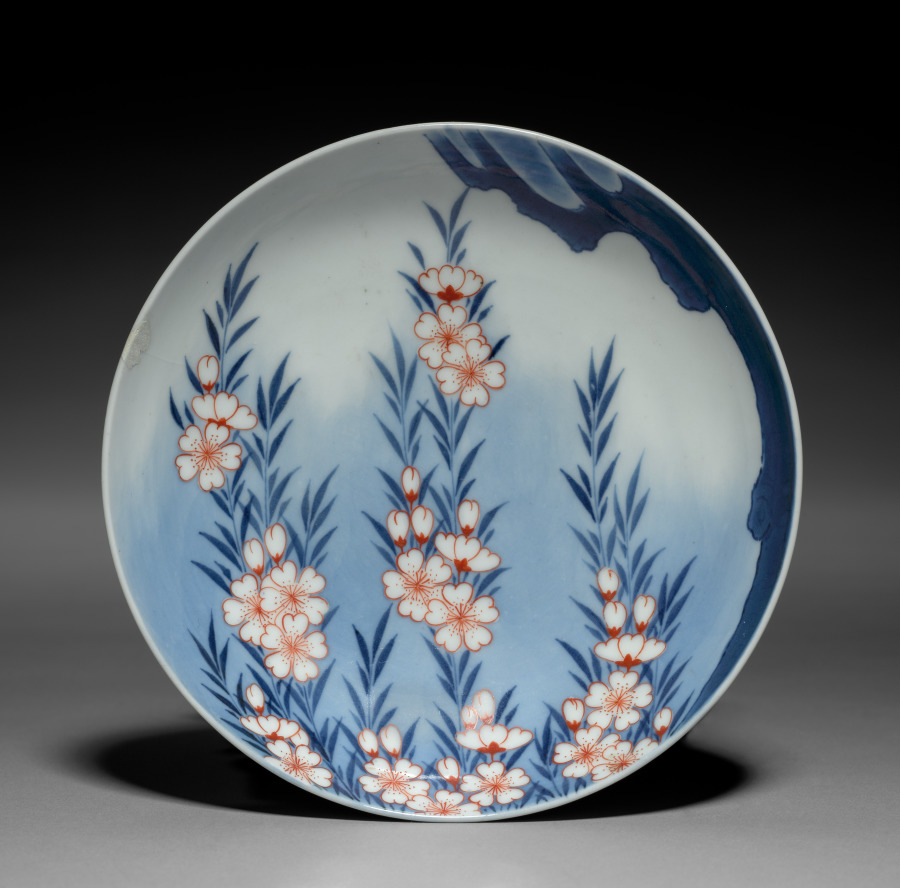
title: Dish with Weeping Cherry Tree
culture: Japan, Meiji period (1868–1912)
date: late 1800s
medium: Porcelain with underglaze blue and overglaze red enamel (Hizen ware, Nabeshima type)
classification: Ceramic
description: This dish depicts a cherry tree (sakuragi) whose flower-laden branches are the centerpiece while the sliver of a trunk and roots appear on the left edge. The sakura blossoms are delicately depicted in an iron-red overglaze. The flowers’ various positions (facing out and downward) and stages of maturity (bud and full bloom) enhance the naturalism and dynamism of the image.